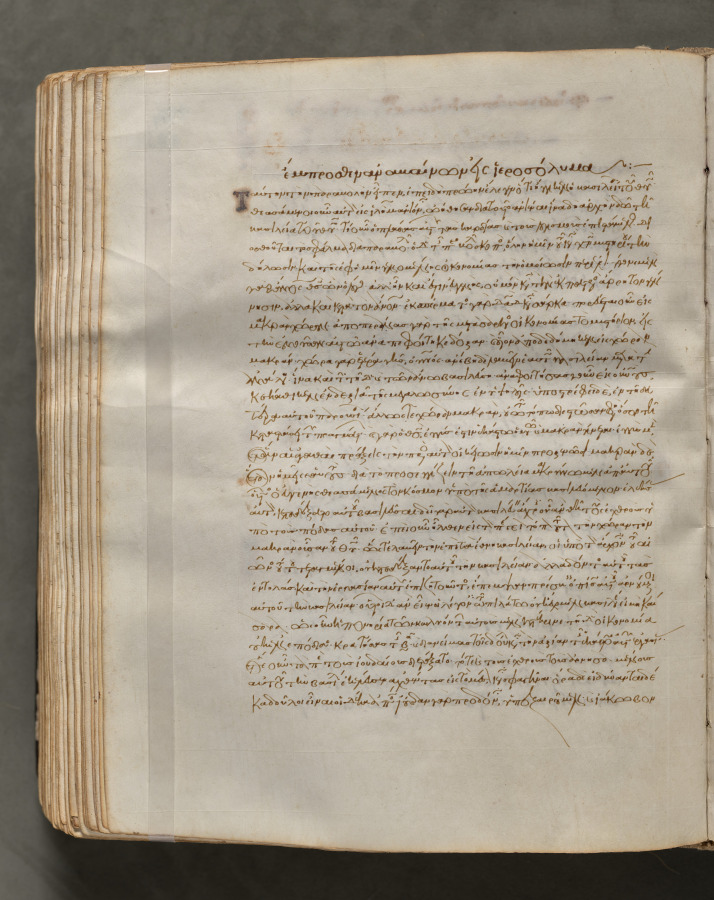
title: Text, folio 295 (verso), from a Gospel Book with Commentaries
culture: Byzantium, Constantinople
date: c. 1000–1100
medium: ink, tempera, and gold on vellum; leather binding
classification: Bound Volume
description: Each of the four gospels in this book opens on a page with brilliantly illuminated borders depicting the author of the text as well as birds—principally peacocks, symbols of the immortality of the soul—and fountains, representing the fountain of life and the salvation of the soul. This volume consists of 428 leaves with texts in Greek. Its level of sophistication suggests that it was probably written and decorated in a monastery in Constantinople.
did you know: Gospel books were carried in procession through Byzantine churches.